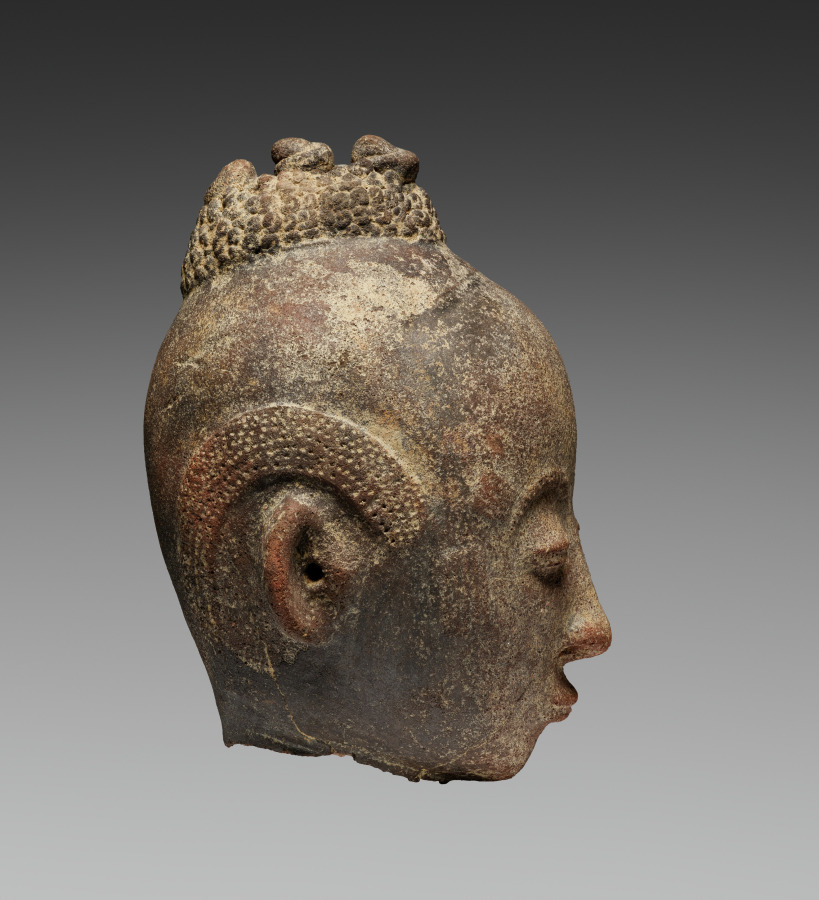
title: Memorial head (nsodie)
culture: Ghana, Akan-style sculpture, unknown female ceramicist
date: late 1600s–early 1700s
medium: Terracotta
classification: Sculpture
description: This is an idealized portrait of an Akan royal. The Akan states formed in West Africa around the 1400s. Akan royal family members commissioned terracotta portraits like this from female artists during someone’s life. Following their death and burial, the family placed these sculptures in a sacred grove. The woman who sculpted this head over 300 years ago worked from memory, without sketches. The resulting sculpture combined idealized physical qualities of elite figures with individual details. The hairstyle and skin color of this portrait reflect its subject’s individuality. In contrast, his calm expression reflects the desired “cool composure” of elites.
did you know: The woman who sculpted this head did so without making a sketch, working from her memory of the subject.